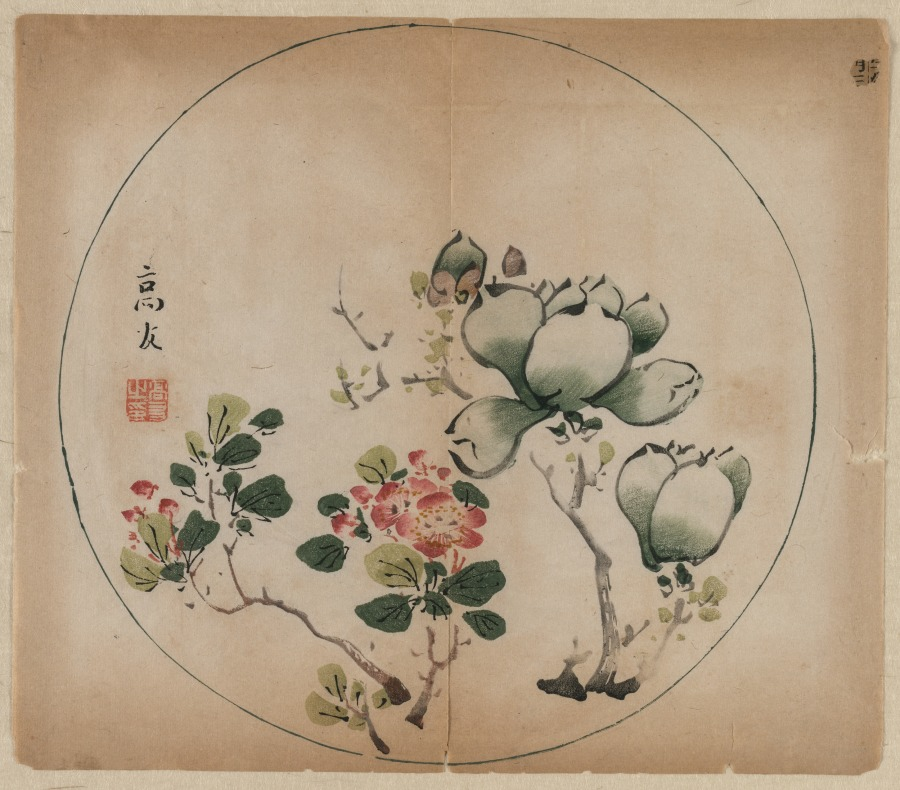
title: Flowering Magnolia and Peach Blossoms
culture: China, Ming dynasty (1368-1644) or later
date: 1368–1644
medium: color woodblock print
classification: Print